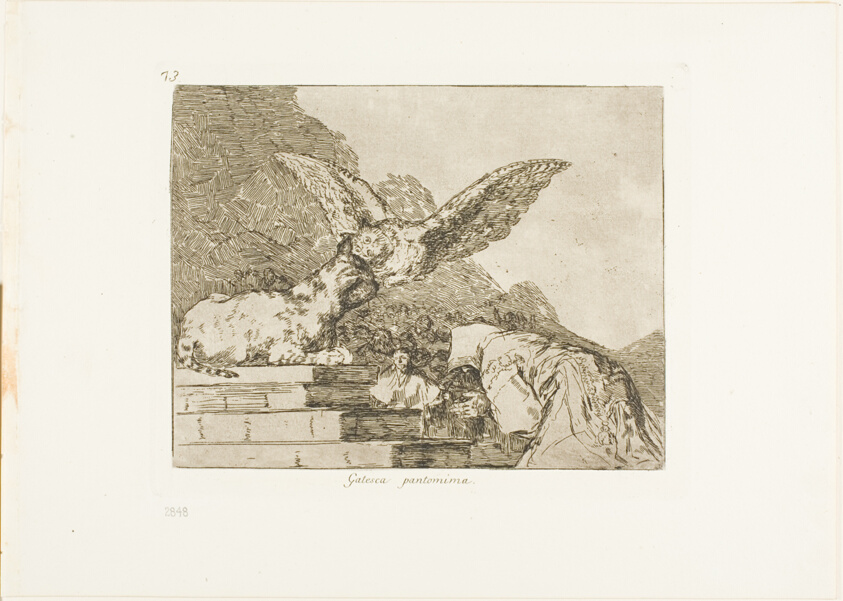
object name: Print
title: Feline pantomime, plate 73 from The Disasters of War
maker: Francisco José de Goya y Lucientes (Spanish, 1746-1828)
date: 1815/20, published 1863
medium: Etching, burin, and burnishing on ivory wove paper with gilt edges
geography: Spain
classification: etching; print; prints and drawing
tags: war